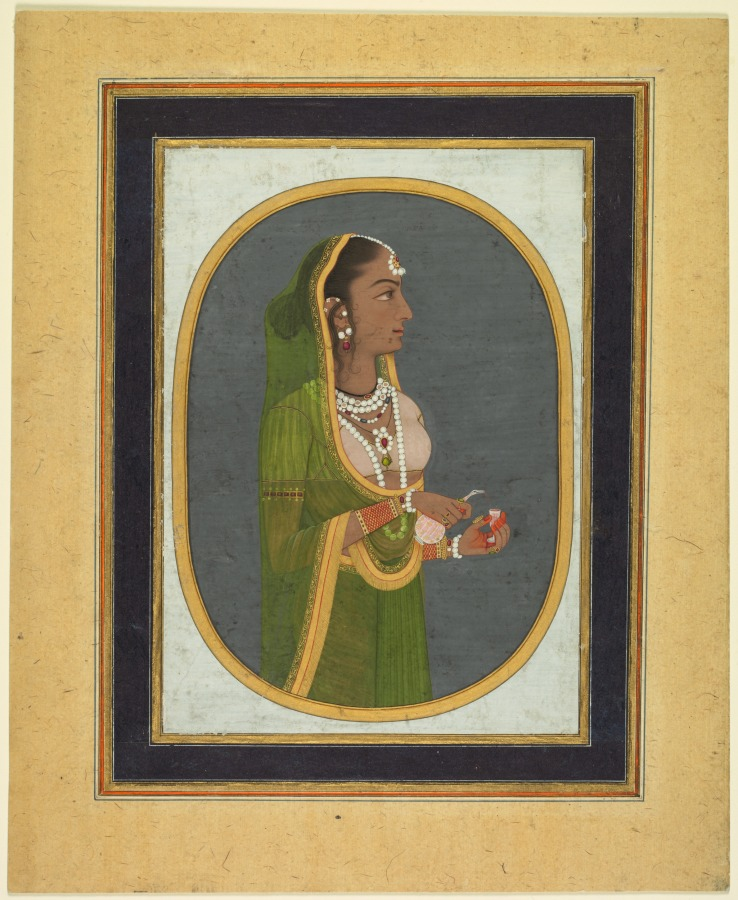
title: Court Lady Pouring Wine (recto); Calligraphy of Lyrical Quatrains (verso)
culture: Mughal India, probably Lucknow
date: c. 1760; borders mid-1700s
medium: Gum tempera, ink, and gold on paper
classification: Painting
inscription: verso: Persian verses in nasta‘liq script. Whoever set eyes on the Opening Verses of your face recited “Say He is the Only God” and breathed it out in pure sincerity. “God has made her grow in purity and beauty,” So recited and passed by Khizr, the moment he saw the green [pubescent] sprouting around your lips.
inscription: verso: Persian verses in top horizontal border, right to left, in nasta‘liq script. My heart became shackled to her tresses; You have lost your head in fulfilling this desire. Go and become entangled in her tresses. If you see her mouth, do not say a word.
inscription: verso: Persian verses in bottom horizontal border, right to left, in nasta‘liq script. If she asks you what you desire, say “your heart.” Since once she knows it, one could never banish her from one’s heart. For one cannot assure one’s heart based on her words of promise; It is not fitting that one should lose one’s heart for naught.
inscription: verso: Persian verses in right vertical border, top to bottom, in nasta‘liq script. From the anguished mood and state of this sorrowful heart, Narrate down the story as you brush down her tresses [conjectural] Of me, in an unfit state, shackled and in chains How I fare in that stifling prison. If you go and seek her out in that abode Once you find her, you should say of me, the heartbroken.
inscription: verso: Persian verses in left vertical border, bottom to top, in nasta‘liq script. I have a heart ensnared by her tresses Exiled in foreign lands [. . .] of her tresses The tale of this broken-hearted soul, like disheveled hair Bring to her ears in a well-composed manner, like well-arranged hair Enchain her tresses in your speech Brush her locks behind her for a while.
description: The artist has depicted a glass or crystal duck-headed decanter adorned with a gilded grapevine motif, signaling the contents. The red wine flows from the duck’s mouth into a tiny cup. Such bird-shaped wine vessels are vestiges of the blood sacrifices once part of ancient Persian court rituals. On the verso, floral sprigs illuminate the central calligraphic work, and paired verses have been written in smaller script all around the border. On this page, all the verses are about the beauty of—and longing for—the beloved.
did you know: The bird-headed decanter evokes blood rites of kingship in pre-Islamic Iran.